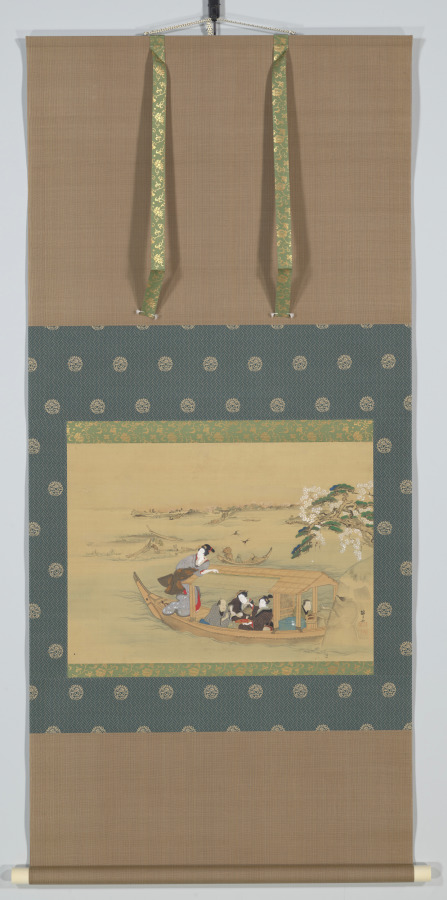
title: Pleasure Boat on the Sumida River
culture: Japan, Edo period (1615–1868)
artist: Teisai Hokuba (Japanese, 1771–1844)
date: 1800s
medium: Hanging scroll; ink and color on silk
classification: Painting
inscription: Signed: Teisai. Sealed: Teisai go [no] in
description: After a major fire in Edo (now Tokyo), the Yoshiwara licensed brothel district was relocated to an area accessed via boat along the Sumida River, giving rise to many compositions depicting travel there. Here, attendants with checkered robes serve refreshment to a client. A figure at the fore of the boat tends to the kitchen. A courtesan at the aft, or rear, surveys the river scene. Acquaintances converse in modest commuter boats, and fishers put in to a tiny island. The boat is near the entrance to the San’ya Canal, where pleasure-seekers would disembark.